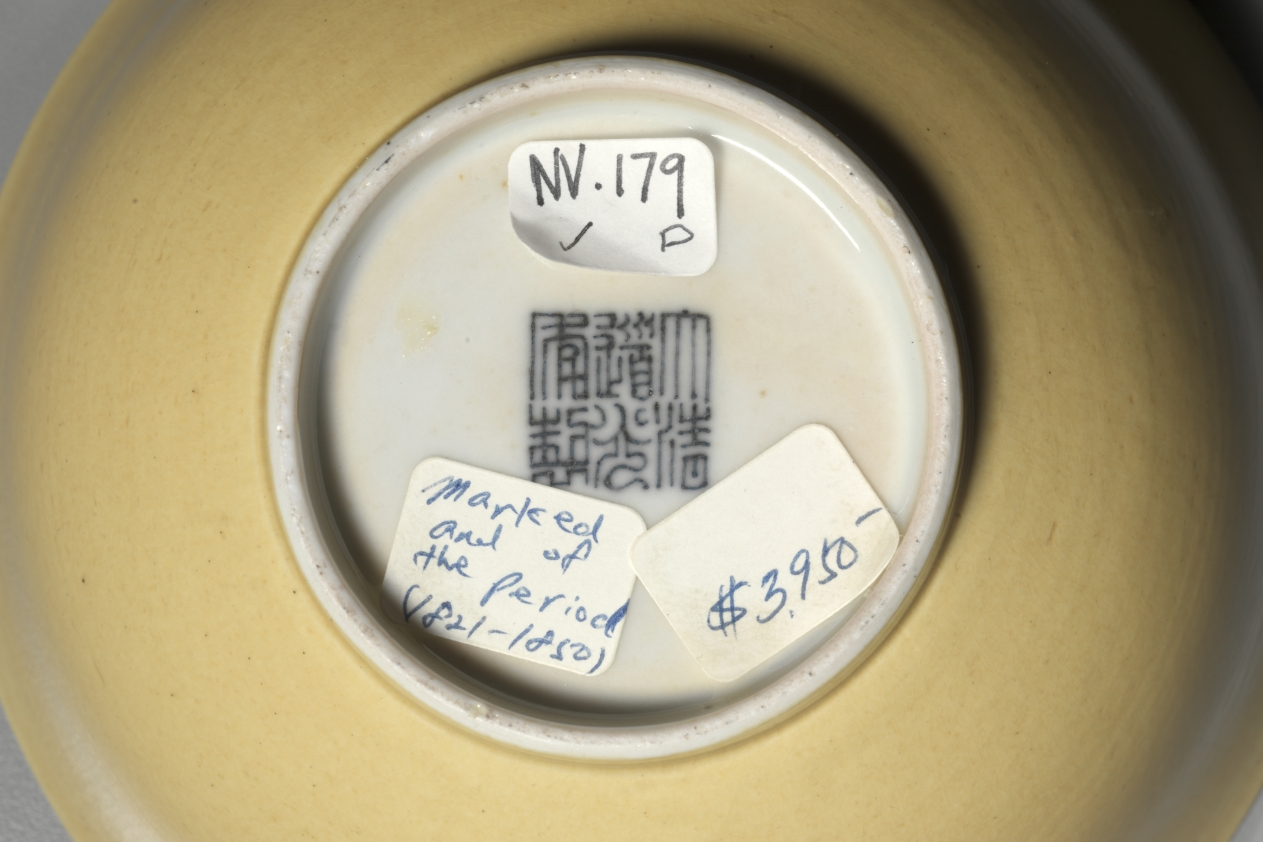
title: Bowl with Yellow Glaze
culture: China, Qing dynasty (1644-1911), Daoguang mark and reign (1821-50)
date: 1821–50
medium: glazed porcelain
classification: Ceramic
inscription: 大清道光年制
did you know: This monochromatic yellow dish was made for the imperial household.